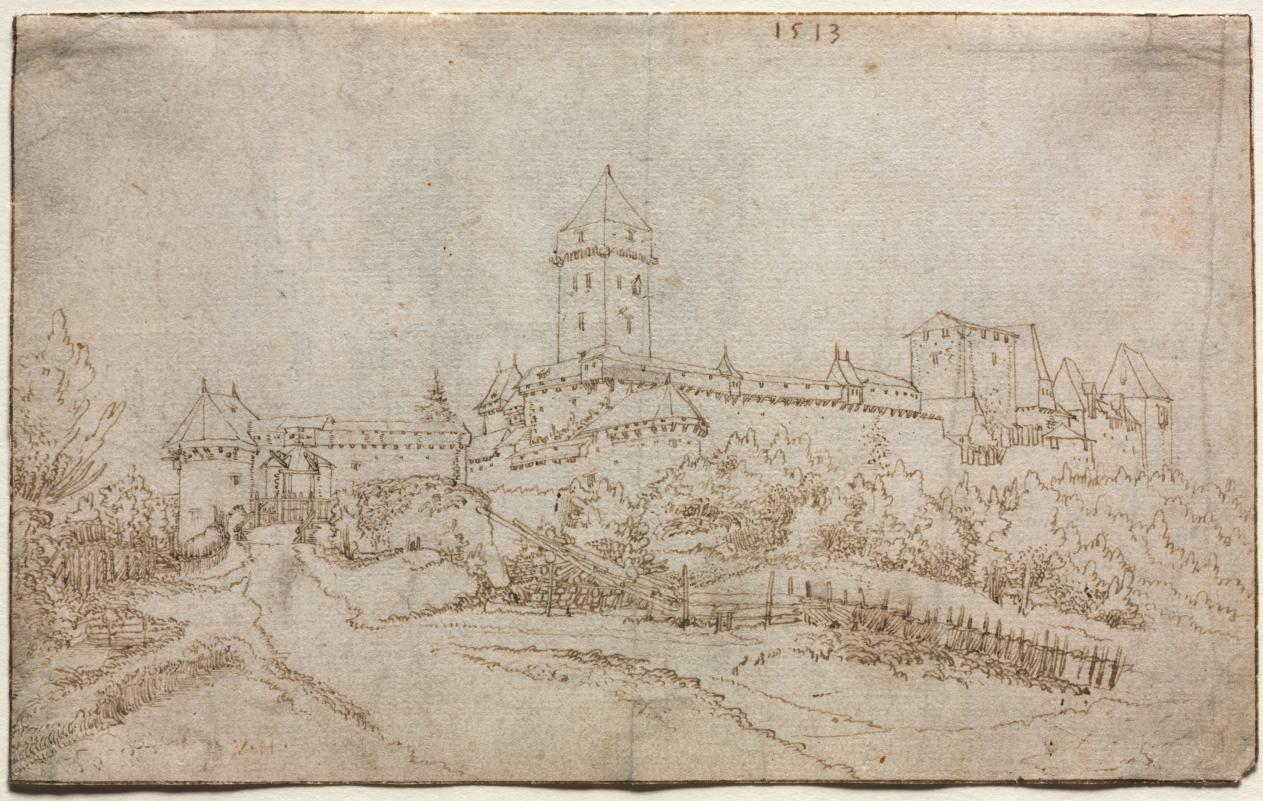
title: View of a Castle (recto)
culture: Austria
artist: Wolfgang Huber (Austrian, 1490–1553)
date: 1513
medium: pen and brown ink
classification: Drawing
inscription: upper center, in brown ink: 1513; lower left, in brown ink: v. h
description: This drawing depicts a castle in southern Germany in the area around the Danube River known for its wooded and rocky heights and dramatic views. Wolfgang Huber's meandering, pen and ink lines describe the contours of the earth and the lushness of summer foliage in a horizontal layout that focuses on the middle distance with a barely recorded foreground. Huber may have made the drawing during a journey between Feldkirch and Vienna as he traveled along the Danube. In 1513 when this drawing was made, landscape was rarely depicted as a subject in and of itself, but artists in the Danube region such as Huber exhibited a profound sensitivity to nature. A drawing on the reverse of the sheet depicts a cup studded with gems and a poem written in a contemporary hand telling the mythological story of Actaeon's transformation into a stag when he intruded upon the goddess Diana and her nymphs bathing.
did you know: This sheet of paper has drawings on both sides as well as a poem, indicating that paper was rarely wasted.